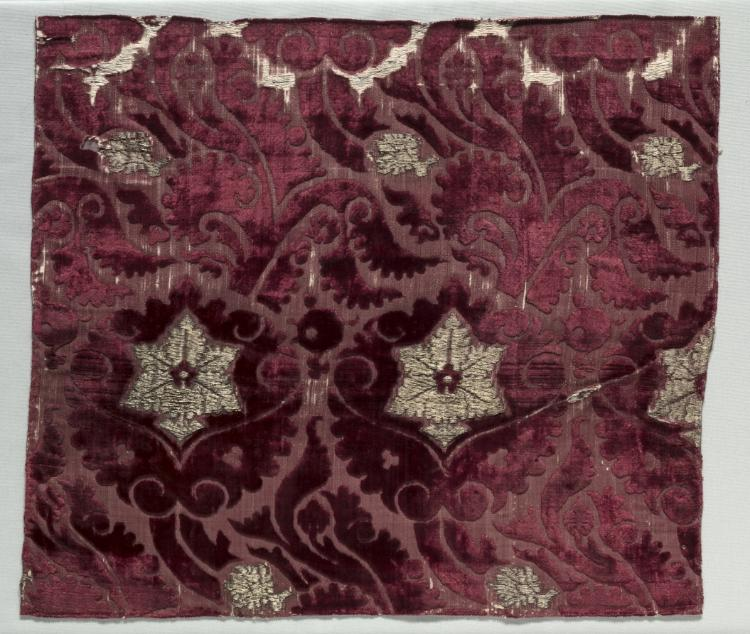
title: Velvet Fragment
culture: Italy, Florence, early 15th Century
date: c. 1400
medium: velvet (cut, voided, and brocaded): silk and gold thread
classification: Velvet